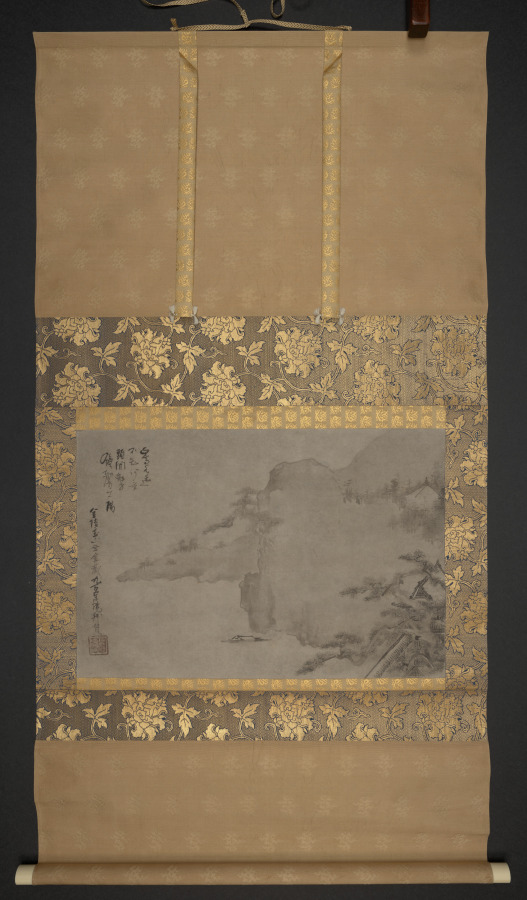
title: Coastal Landscape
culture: Japan, Momoyama period (1573–1615)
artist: Iwasa Matabei (Japanese, 1578–1650)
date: 1573–1615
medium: hanging scroll; ink on paper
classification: Painting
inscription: signed: signature unread